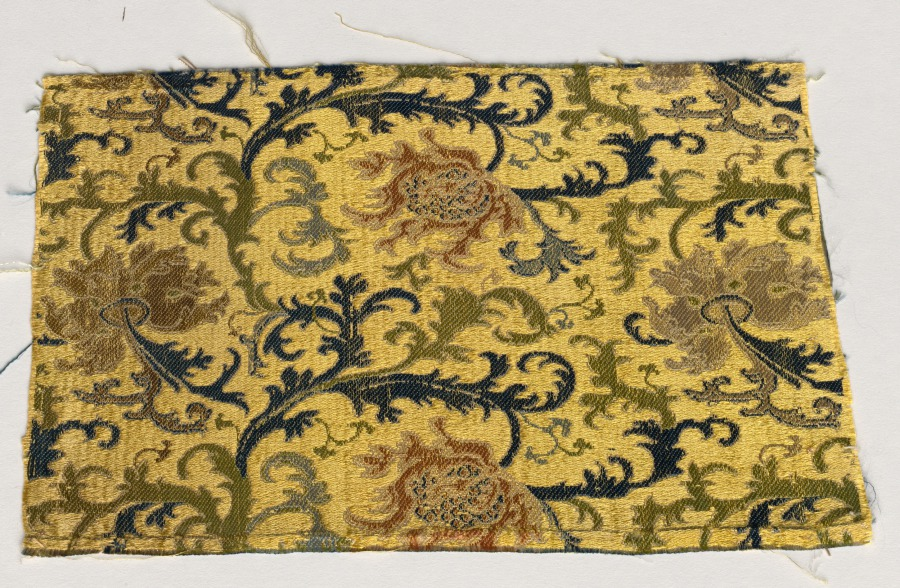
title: Fragment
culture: China, 18th century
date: 1700s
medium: satin ground; silk diasper weave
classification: Textile